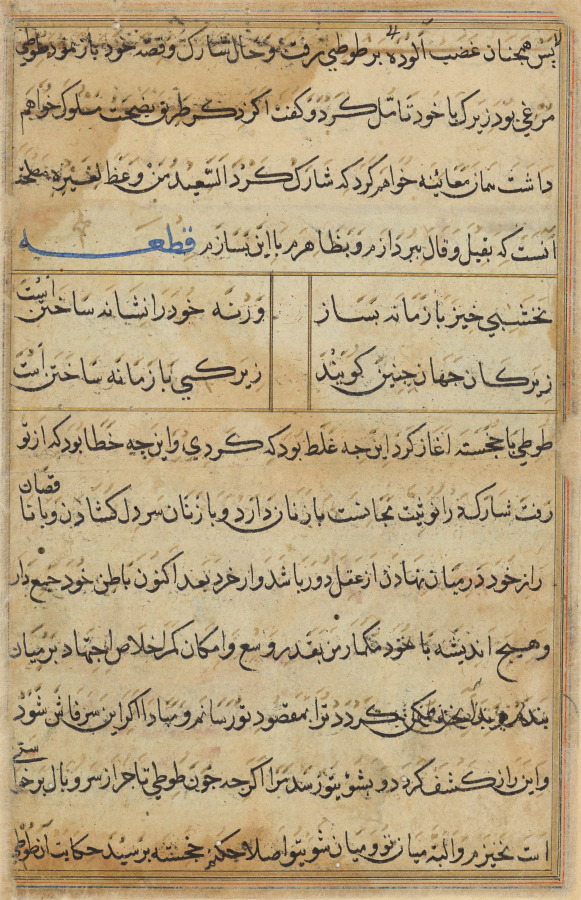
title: Page from Tales of a Parrot (Tuti-nama): text page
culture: Mughal India, court of Akbar (reigned 1556–1605)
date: c. 1560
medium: gum tempera, ink, and gold on paper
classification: Painting